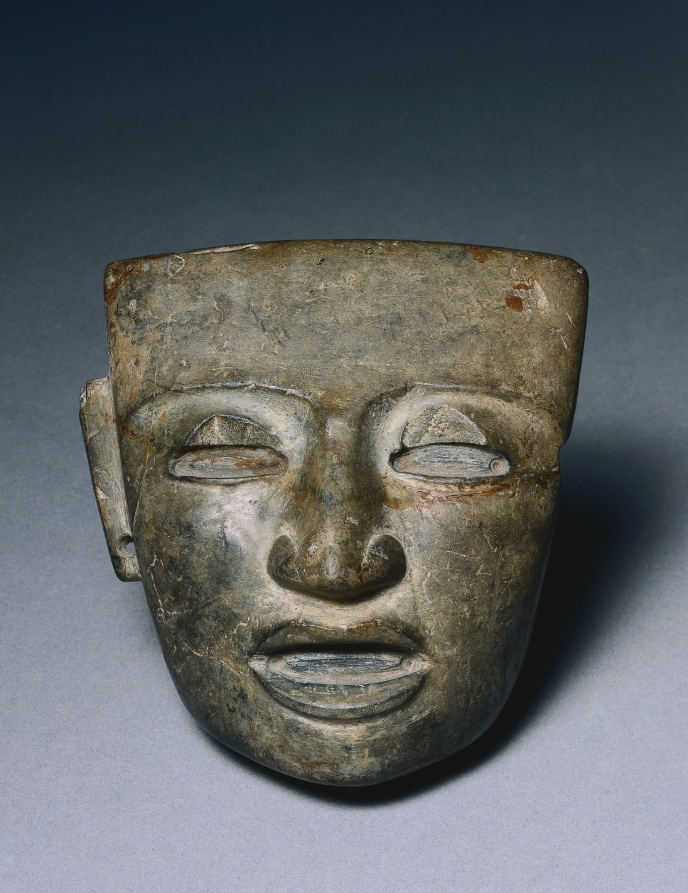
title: Mask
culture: Central Mexico, Teotihuacán style, Classic period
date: 1–550 CE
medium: stone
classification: Sculpture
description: Many Teotihuacán masks were once tied to something via holes on the back--perhaps a body-shaped form dressed in garments, ornaments, and a headdress that identified the figure. The stone masks’ eyes and mouths once held inlays representing irises, pupils, and teeth.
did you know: These stone masks have been found near temples, but not in homes or burials.